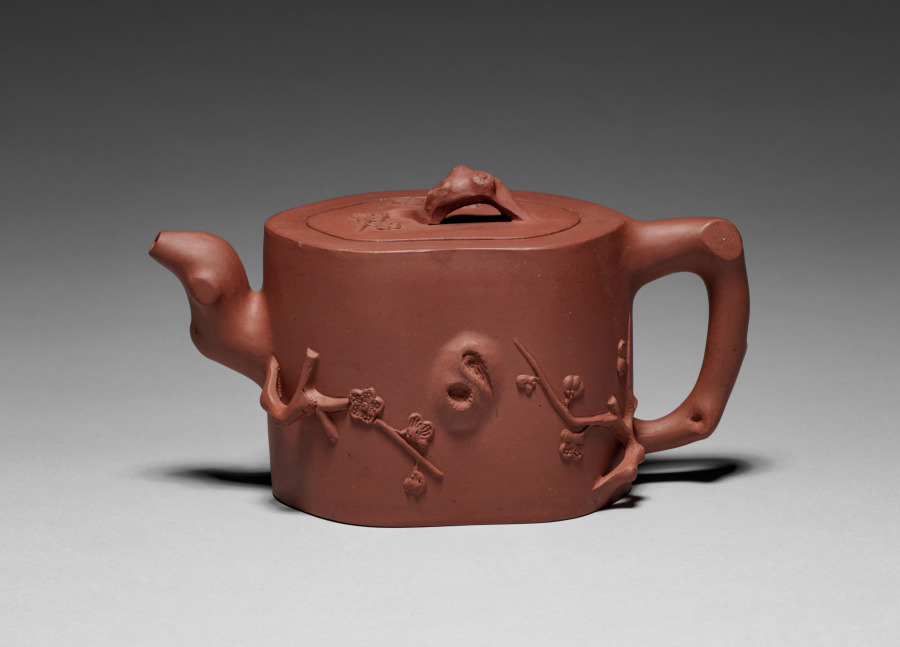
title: Yixing Teapot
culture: China, Qing dynasty (1644-1911)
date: 1800s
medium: stoneware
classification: Ceramic